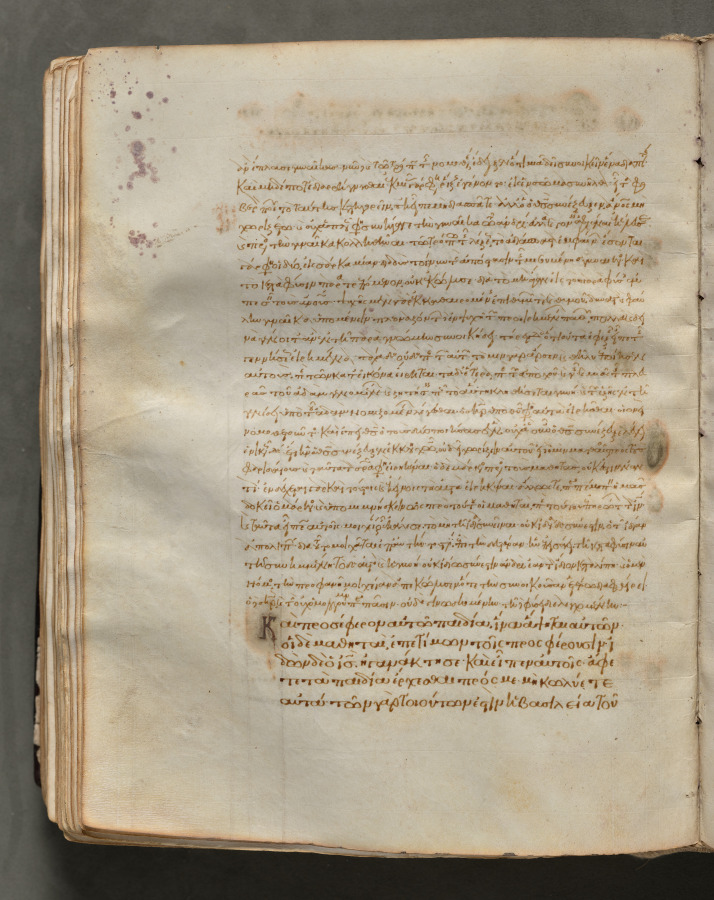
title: Text, folio 168 (verso), from a Gospel Book with Commentaries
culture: Byzantium, Constantinople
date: c. 1000–1100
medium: ink, tempera, and gold on vellum; leather binding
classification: Bound Volume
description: Each of the four gospels in this book opens on a page with brilliantly illuminated borders depicting the author of the text as well as birds-principally peacocks, symbols of the immortality of the soul-and fountains, representing the fountain of life and the salvation of the soul. This volume consists of 428 leaves with texts in Greek. Its level of sophistication suggests that it was probably written and decorated in a monastery in Constantinople.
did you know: Gospel Books were carried in procession through Byzantine churches.